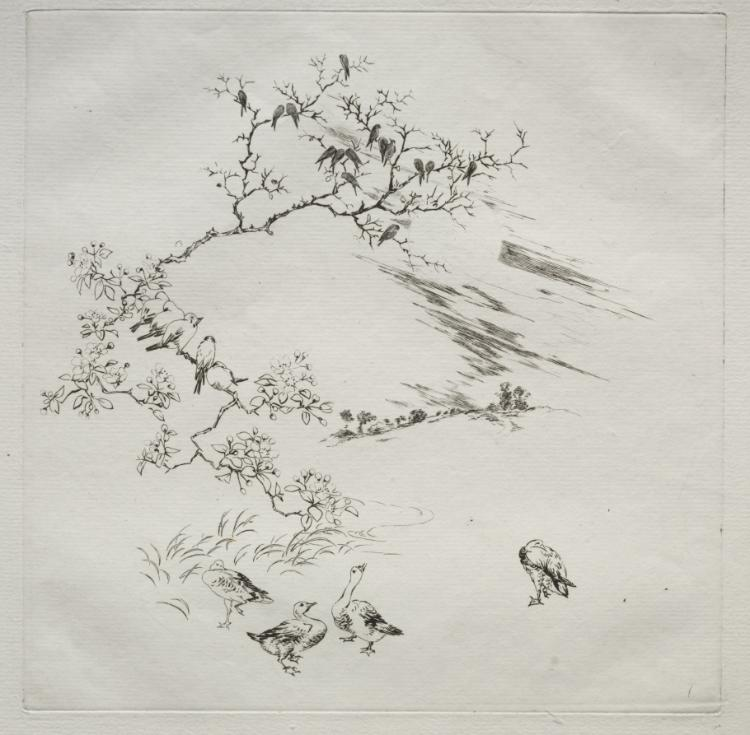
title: Parisian Service (Haviland service): Night (no. 7)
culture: France, 19th century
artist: Félix Bracquemond (French, 1833–1914)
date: 1875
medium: etching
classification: Print